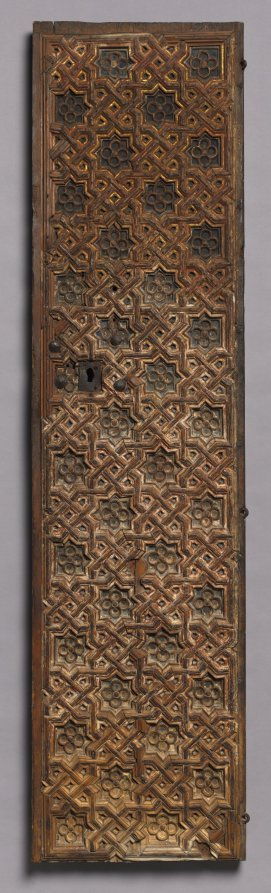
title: Door (right)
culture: Spain, early 15th century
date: early 1400s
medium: gilded and painted wood (pine)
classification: Furniture and woodwork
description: Typical of Muslim-inspired ornamentation, these doors reflect a love of geometric decoration stemming from a nonrealistic artistic tradition. They consist of applied wood strips that form eight-point stars, flowers, and geometric interlace designs. Such designs are reflected in the tiles, ceramic vessels, and metalwork of Muslim-occupied Spain. The origin of the doors is not known, but they may have belonged to a palace or domestic residence. In 711 the Moors had invaded and conquered nearly the entire peninsula. During the next 750 years, independent Muslim states were established, and the entire area of Muslim control became known as Al-Andalus. Muslim philosophers and scientists developed knowledge in areas like medicine, optics, algebra, chemistry, and geometry, as seen here.